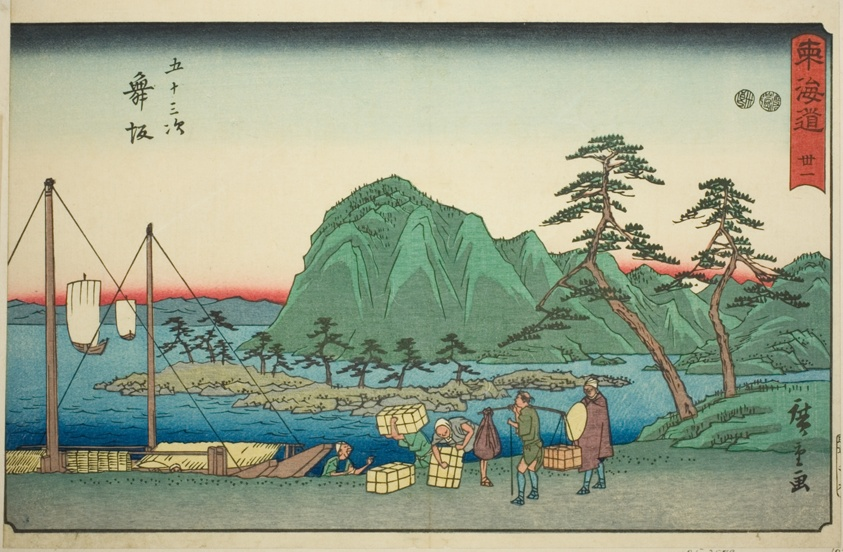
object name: Print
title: Maisaka—No. 31, from the series "Fifty-three Stations of the Tokaido (Tokaido gojusan tsugi)," also known as the Reisho Tokaido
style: Japanese (culture or style)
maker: Utagawa Hiroshige 歌川 広重; Japanese, 1797-1858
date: c. 1847/52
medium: Color woodblock print; oban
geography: Japan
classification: woodblock print; print; asian art